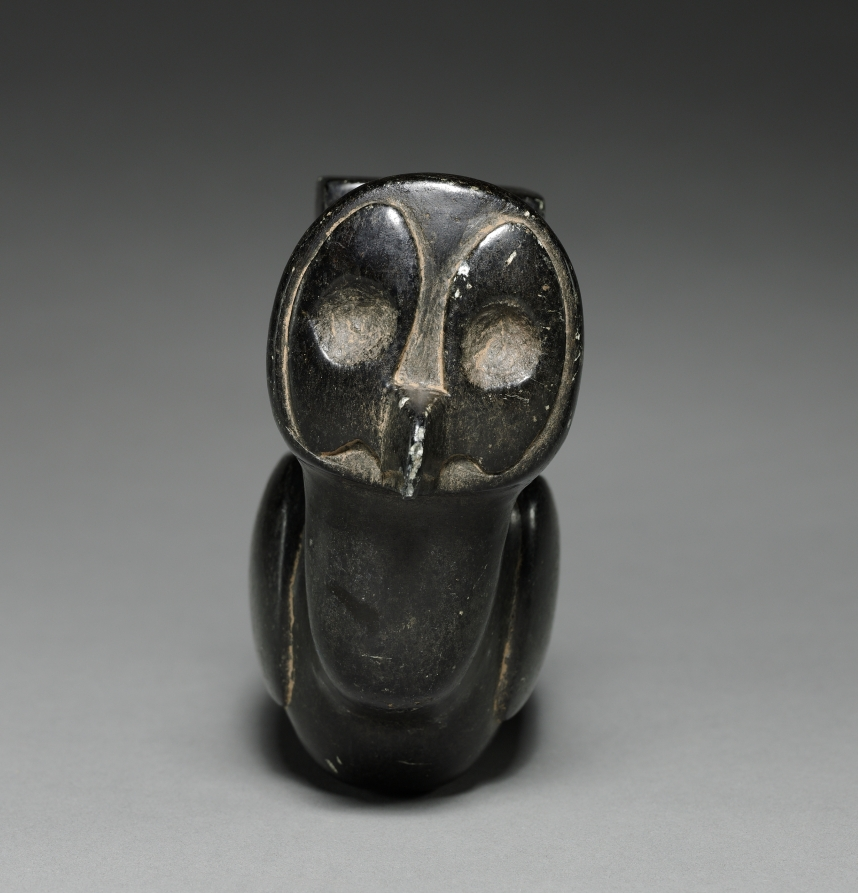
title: Pipe in the Form of an Owl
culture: America, North American Indian, Copena Culture (Tennessee area?)? or modern reproduction, Middle Woodland Period (100-600) or 20th century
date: 100–600 CE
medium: stone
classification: Sculpture